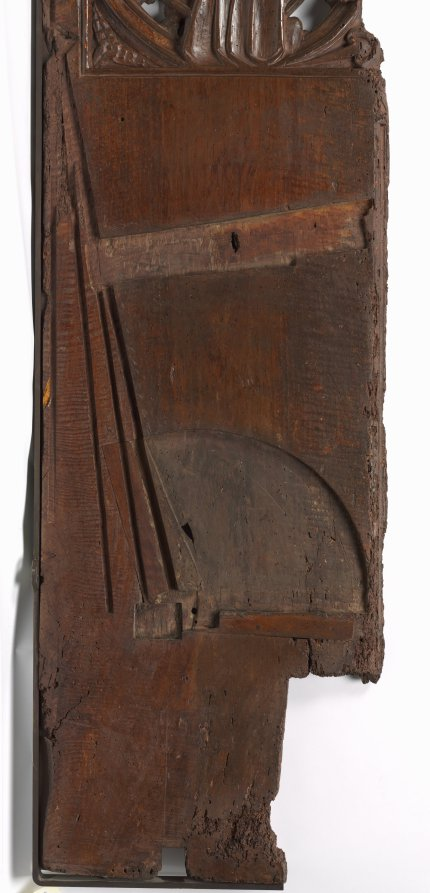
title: Panel from a Choir Stall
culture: Spain, Catalonia, Monastery of Pedralbes, 14th century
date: c. 1330–1340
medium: walnut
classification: Furniture and woodwork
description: The large panel shown here was probably the end panel of a stall that faced another across the choir of a Gothic church. The panel is carved with the figure of St. Francis of Assisi kneeling in prayer and receiving the stigmata. Two standing figures also appear on this panel: a nun at the left (perhaps St. Claire) and a female martyr at the right. Below is St. Michael and the dragon.